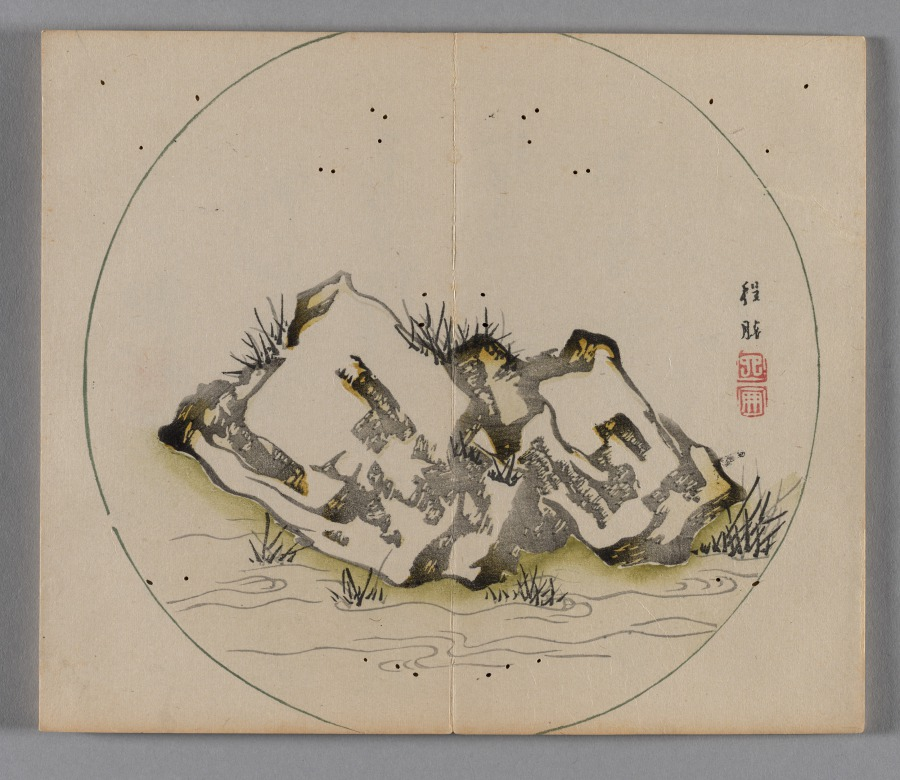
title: Ten Bamboo Studio Collection of Calligraphy and Painting: Round Fans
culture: China, Qing dynasty (1644-1911)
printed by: Hu Zhengyan (Chinese, c. 1584–1674)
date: 1633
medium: Woodblock-printed book; ink and colors on paper; first edition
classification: Print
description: Color printing reached a level of perfection in the early 1600s, as seen in this Ten Bamboo Studio Collection of Calligraphy and Painting and the Mustard Seed Garden Manual of Painting (printed 1679 and 1701). The painterly quality, precision in registering (aligning) the woodblocks, and harmonious colors made them the most successful color print editions in Chinese history. Both editions were printed and compiled in Nanjing, spread nationwide, and had a great impact on the arts in Japan and Korea.